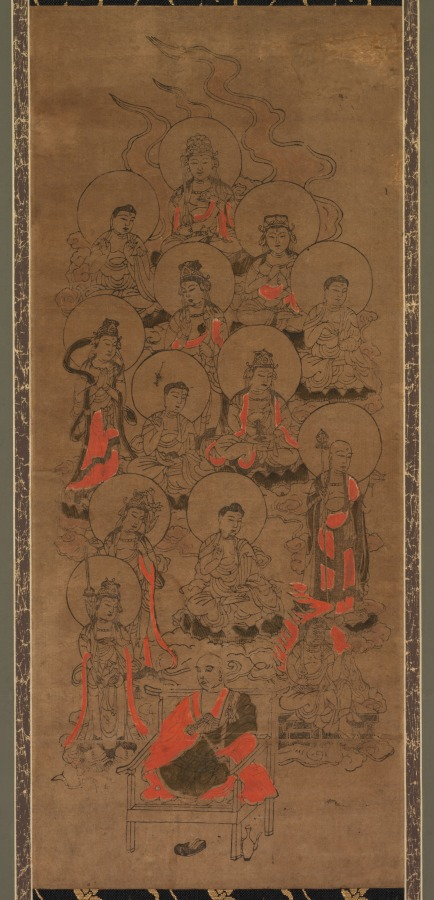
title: Twelve Buddhas and Kobo Daishi (Jusanbutsu)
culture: Japan, Edo period (1615–1868)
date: late 1600s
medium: stencil print (Kappa-zuri); ink and color on paper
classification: Print